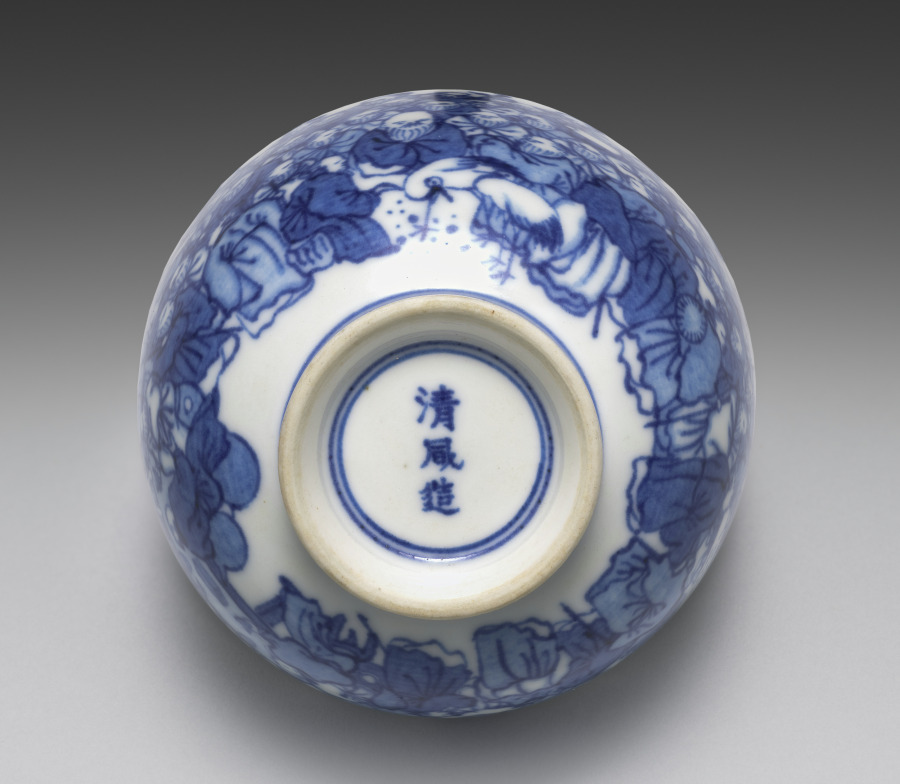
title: Teacup from Teacups with a Hundred Sages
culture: Japan, Meiji period (1868–1912)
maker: Seifū Yohei III (Japanese, 1851–1914)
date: 1893–1914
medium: One from a set of five teacups; porcelain with underglaze blue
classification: Ceramic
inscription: 清風造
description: Each of these five teacups has a painting of identical design in underglaze blue, but as the tiny figures are drawn entirely by hand, each cup has its own personality. The theme of the sencha cups is an assembly of sages or immortals, literally “a hundred venerable [people]” (hyakurō). The myriad figures crowd the scene in groups. The god of longevity, with his tall forehead, sits with his cranes, having flown in from Mt. Penglai on the Isle of the Immortals. Seven long-bearded sages sit around a stone table, chatting and drinking; one is seated on an enormous gourd. Of course, there is a stack of books on the table, and elsewhere, scrolls are being written upon or read—in one case held very close by a sage who is wearing glasses. The design was enormously popular in ceramics made for those engaged in literati culture.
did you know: Seifū Yohei III (1851–1914) produced many works for tea gatherings where people drank Chinese-style leaf-tea (sencha).